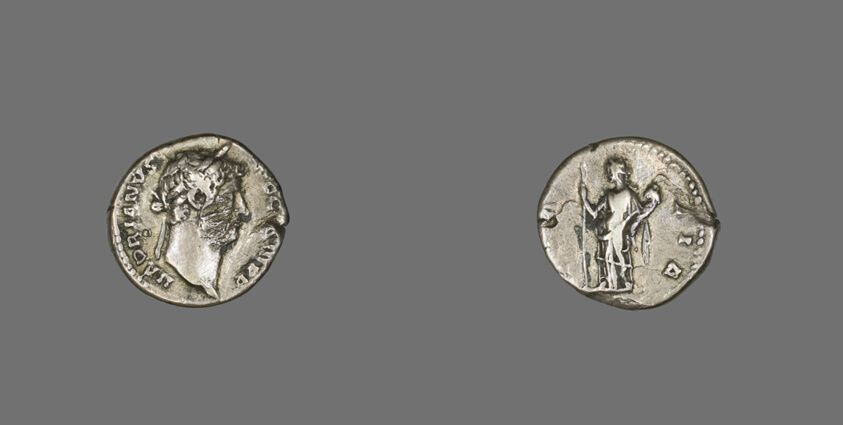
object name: Coin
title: Denarius (Coin) Portraying Emperor Hadrian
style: imperial (roman), ancient, roman (ancient, style or period)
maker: Roman, minted in Rome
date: 134-138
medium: Silver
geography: Roman Empire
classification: coin; ancient art; struck